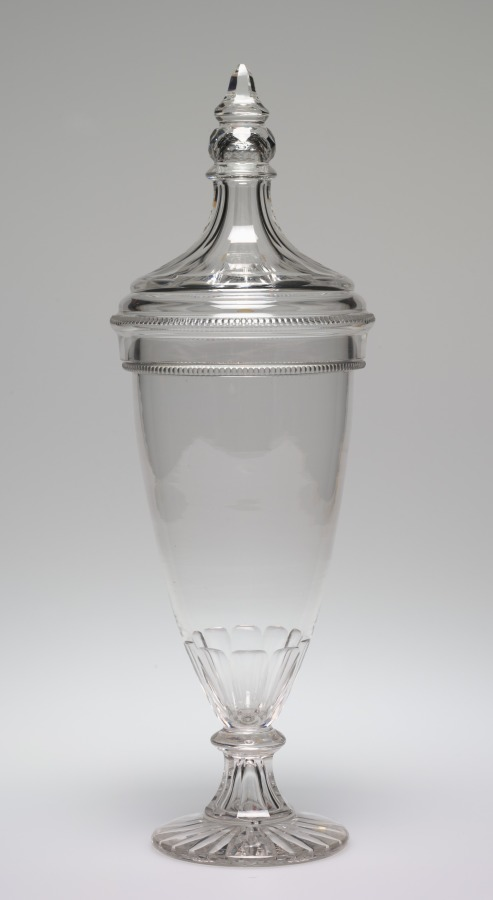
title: Candy Jar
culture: America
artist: firm of Christian Dorflinger (American, 1828–1915)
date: 1869–1880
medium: glass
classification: Glass